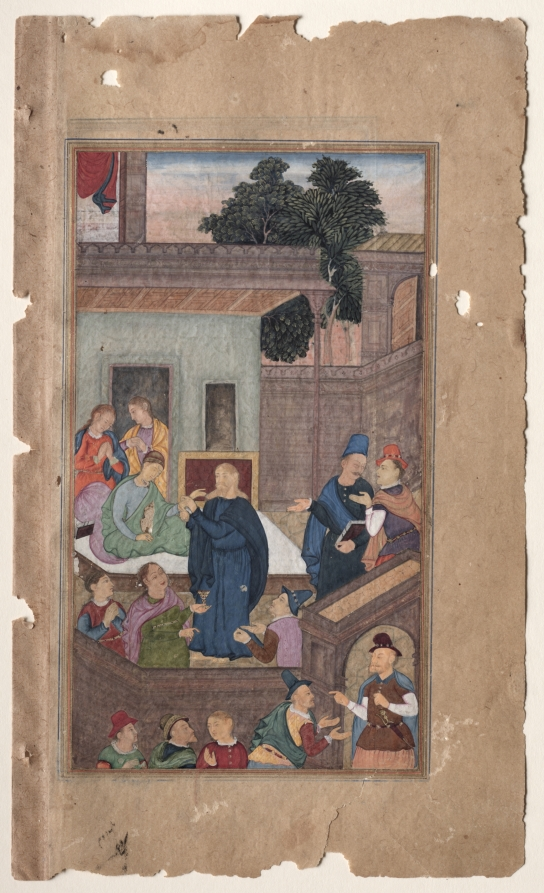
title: Jesus Raises Jairus’s Daughter from the Dead (folio 82 verso), from a Mirror of Holiness (Mir’at al-quds) of Father Jerome Xavier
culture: Mughal India, Allahabad, made for Prince Salim (1569–1627)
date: 1602–4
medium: Gum tempera, ink, color, and gold on paper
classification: Manuscript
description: Jesus gestures toward the 12-year-old girl he has awakened from the dead, in a lesser-known miracle included in Father Jerome’s text. The elder of a synagogue, the girl’s father, named Jairus, had shown great faith in Jesus and had begged him to help his daughter; Jairus may be the figure dressed as a Jesuit in a dark cloak and tall matching cap behind Jesus. Jesus admonished the crowd to tell no one about the miracle, but people turn and gesture to one another, unable to keep from spreading the news.